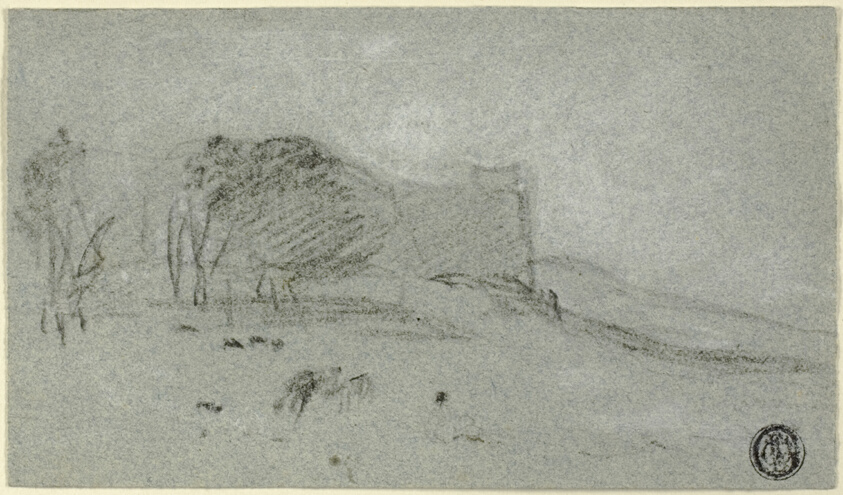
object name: Drawing and Watercolor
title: Hampstead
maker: Possibly Margaret Sarah Carpenter; English, 1793-1872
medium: Black and white chalk on blue wove paper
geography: England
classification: chalk; drawings (visual works); prints and drawing